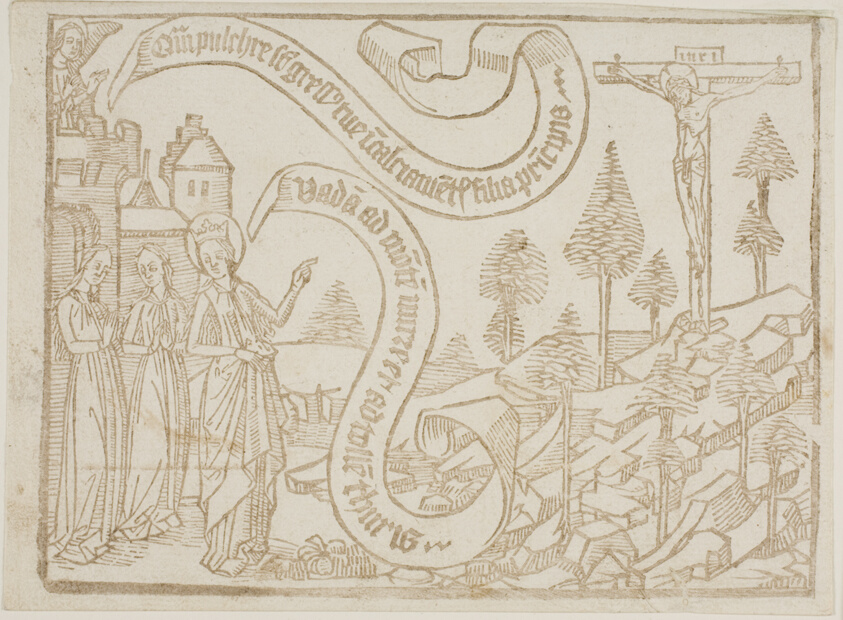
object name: Print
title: Page from the Canticum Canticorum (The Song of Solomon)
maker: Unknown artist (German or Netherlandish)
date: c. 1469-70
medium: Woodcut on paper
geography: Germany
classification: woodcut; print; prints and drawing